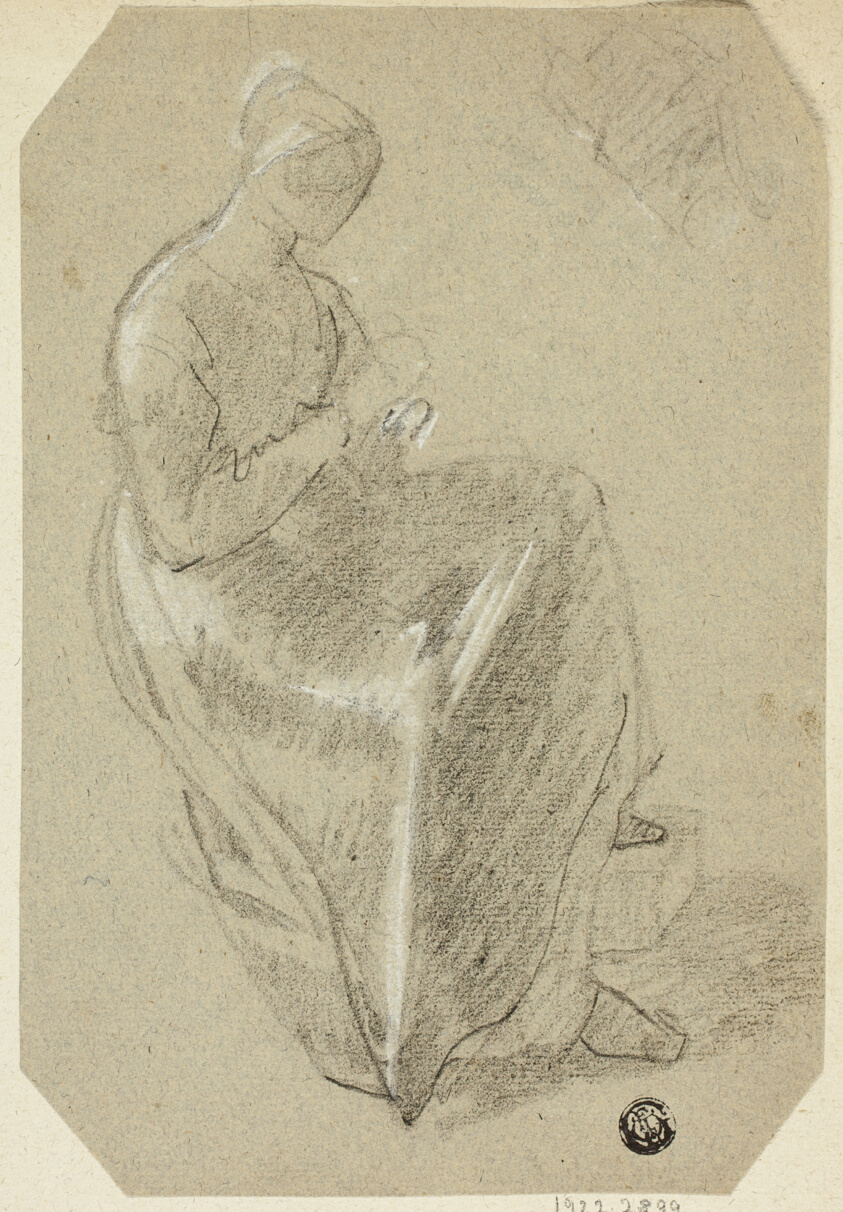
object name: Drawing and Watercolor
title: Seated Woman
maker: Unknown Artist; British, 19th century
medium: Black chalk, heightened with white chalk, on gray laid paper with blue fibers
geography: United Kingdom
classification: chalk; drawings (visual works); prints and drawing; paper